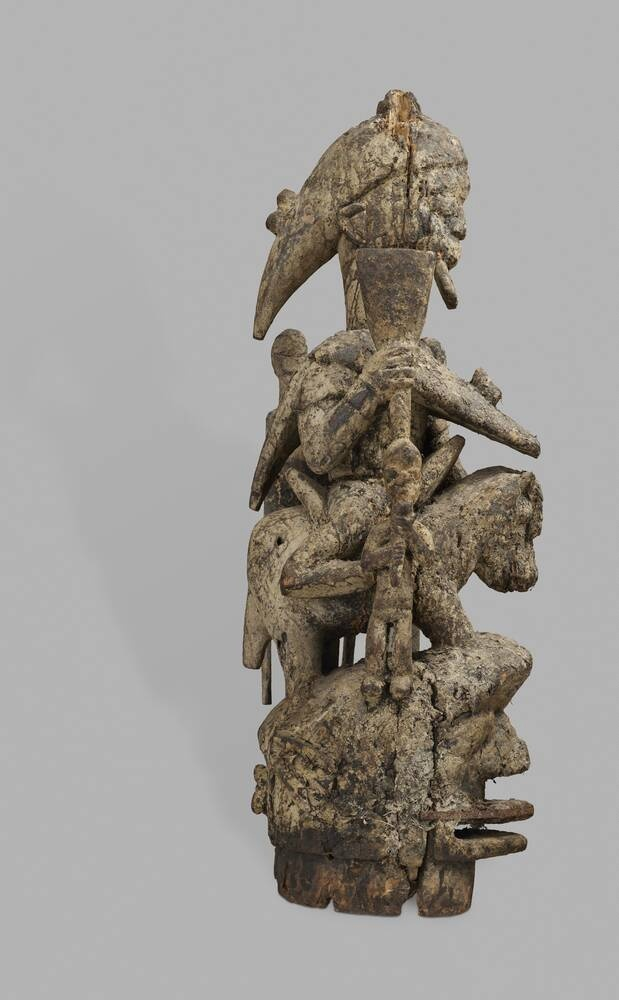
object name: Costume and Accessories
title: Headdress (Jagún Jagún)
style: yoruba, Arts of Africa, african Art, Coastal West Africa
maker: Yòrùbá; Ekiti region, Nigeria; Coastal West Africa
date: Mid– late 19th century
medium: Wood, iron, nails, fiber, and sacrificial materials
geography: Nigeria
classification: headdress; arts of Africa; shrine; ceremonial object; ritual objects; masks; costume; african art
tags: warriors, masks, animals, horseback riding, ritual, warfare